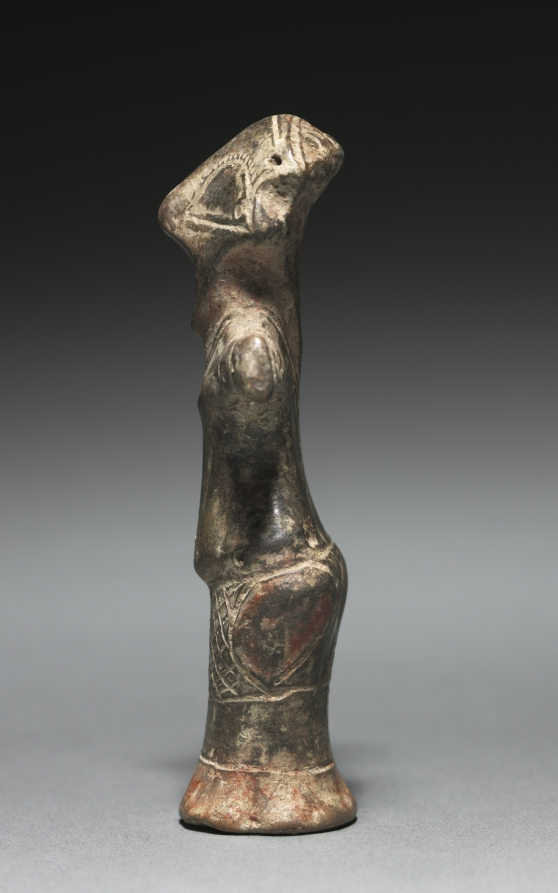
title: Vinca Idol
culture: Serbia, Vinça culture, Neolithic Era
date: 4000 BCE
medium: fired clay with paint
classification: Ceramic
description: This statuette, probably a cult idol, dates to the Neolithic Era which saw the development of farming and human technology. It is extraordinarily well preserved and derives from the settlement at Vinca in modern Serbia. This flourishing culture was the largest known in Europe at that time, extending along the Danube into the Balkans and Central Europe. Thousands of clay statuettes have been discovered in the region's Vinca settlements suggestive of the intense magic-religious practices within the Vinca culture. This statuette is anthropomorphic, or human-shaped, and is presumed to have been used for ritual purposes. The use of red paint is typical of Vinca Neolithic figurines, and few have survived in such excellent condition.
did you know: This figurine depicts a female deity with a protruding belly and plump buttocks.